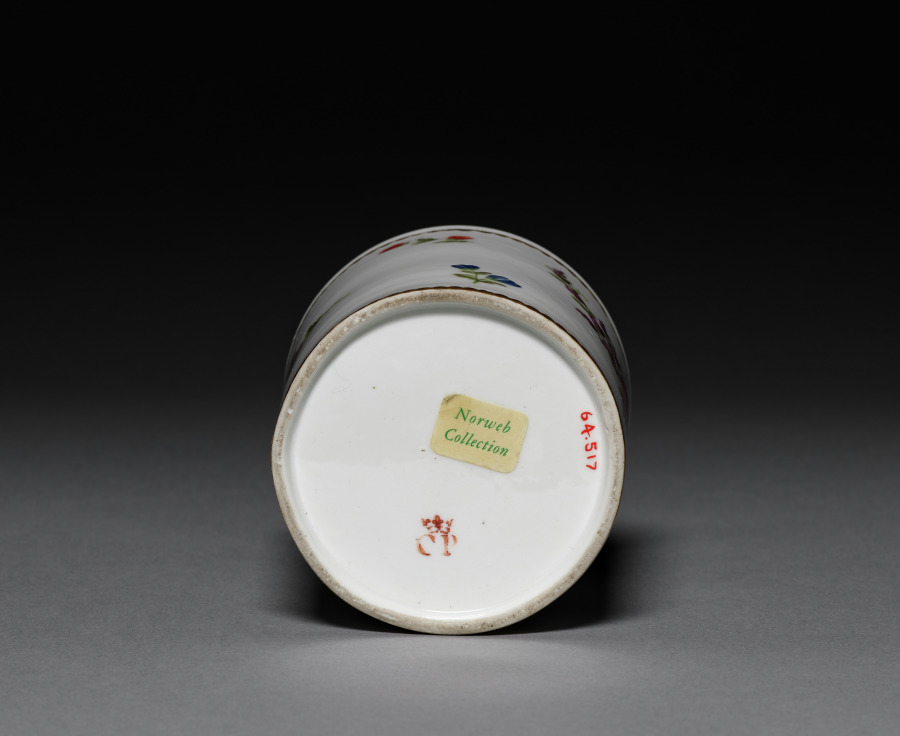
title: Jar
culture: France, 18th century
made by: Faubourg Saint-Denis (French)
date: c. 1775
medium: porcelain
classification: Ceramic